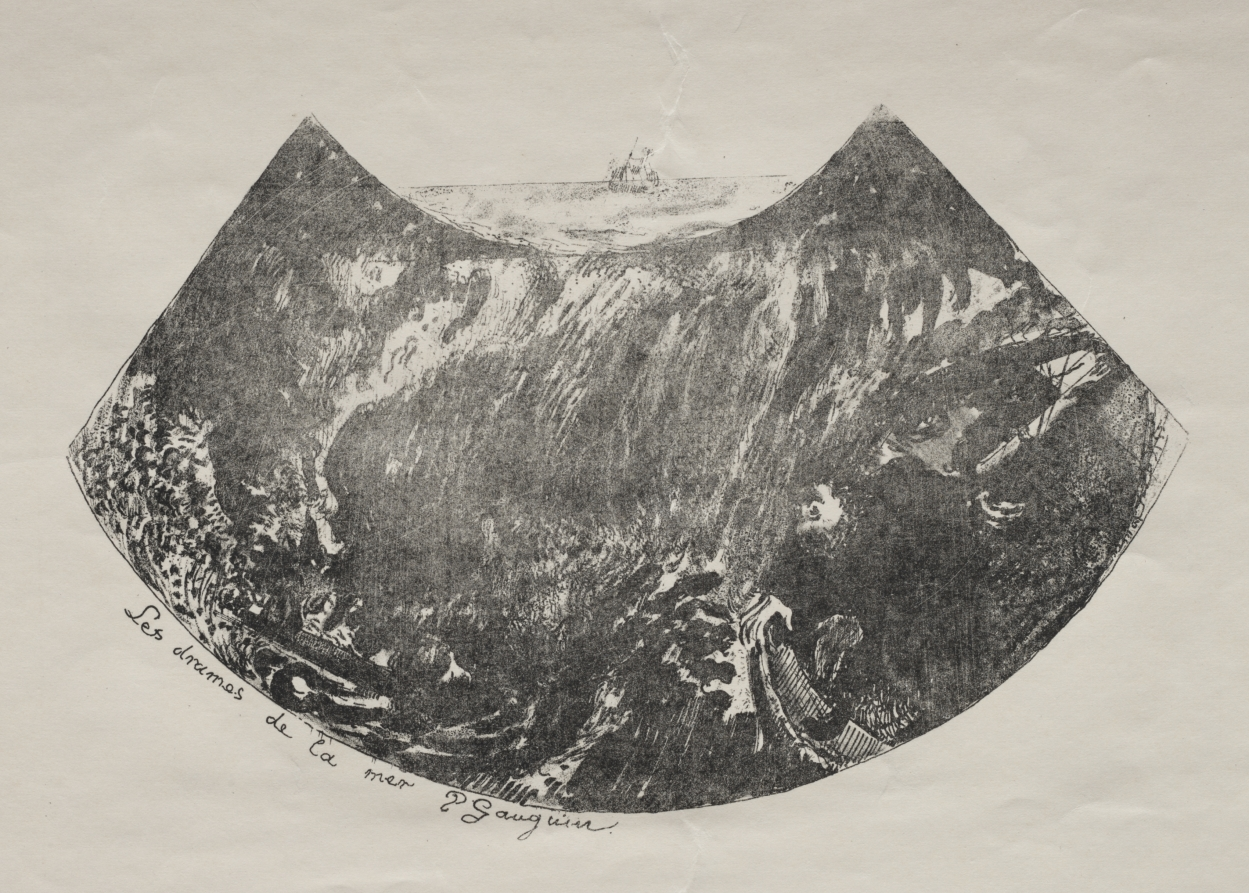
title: Dramas of the Sea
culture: France, 19th century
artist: Paul Gauguin (French, 1848–1903)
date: c. 1889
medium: lithograph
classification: Print